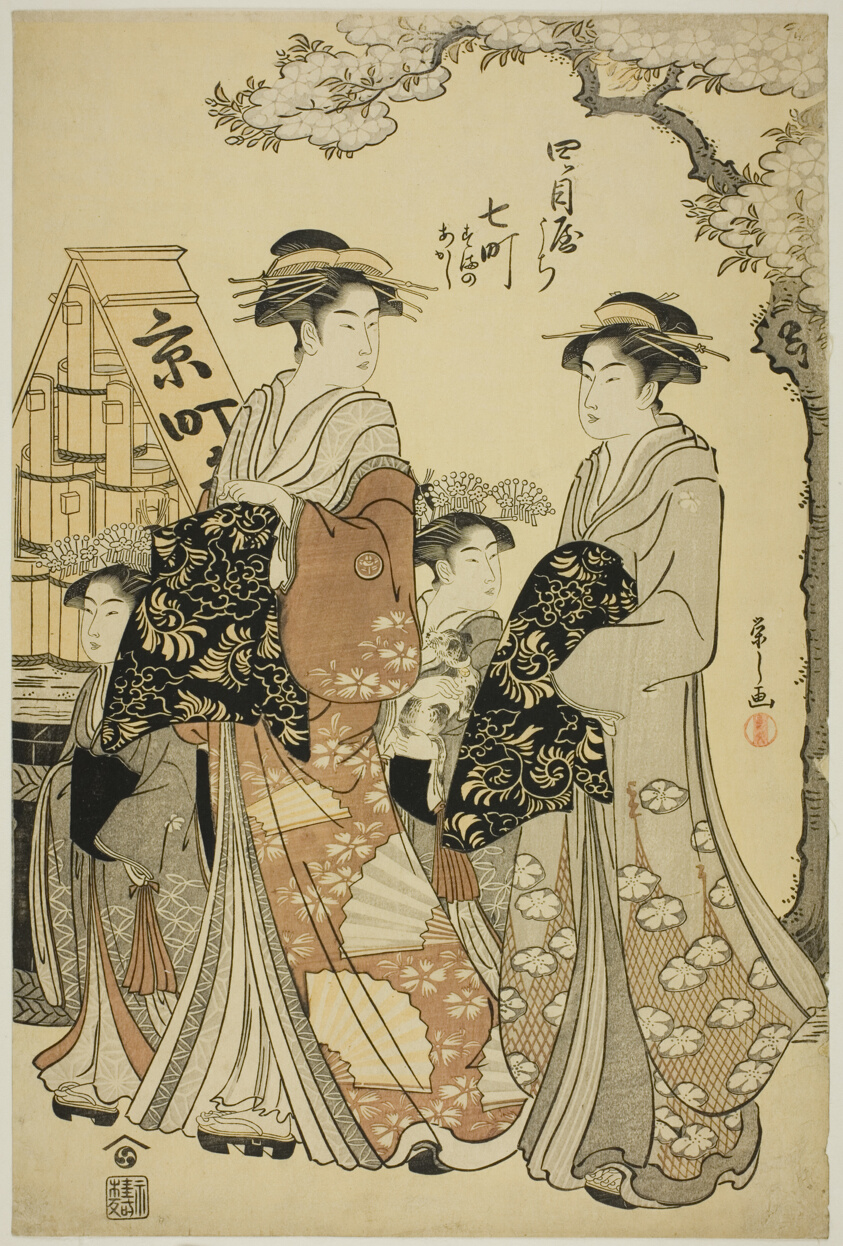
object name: Print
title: Nanamachi of the Yotsumeya with Attendants Sumano and Akashi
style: Japanese (culture or style)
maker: Chobunsai Eishi; Japanese, 1756-1829; Publisher: Hibino Yohachi; Japanese, unknown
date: c. 1787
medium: Color woodblock print; oban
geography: Japan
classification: woodblock print; print; asian art